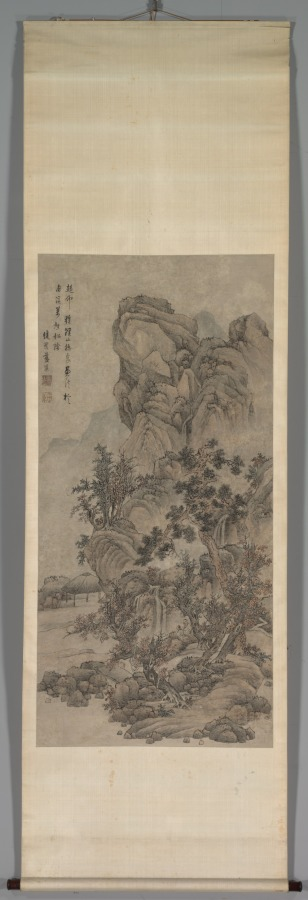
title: Landscape with Figures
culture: China, Qing dynasty (1644-1911)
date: 1644–1911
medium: hanging scroll, ink and slight color on paper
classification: Painting